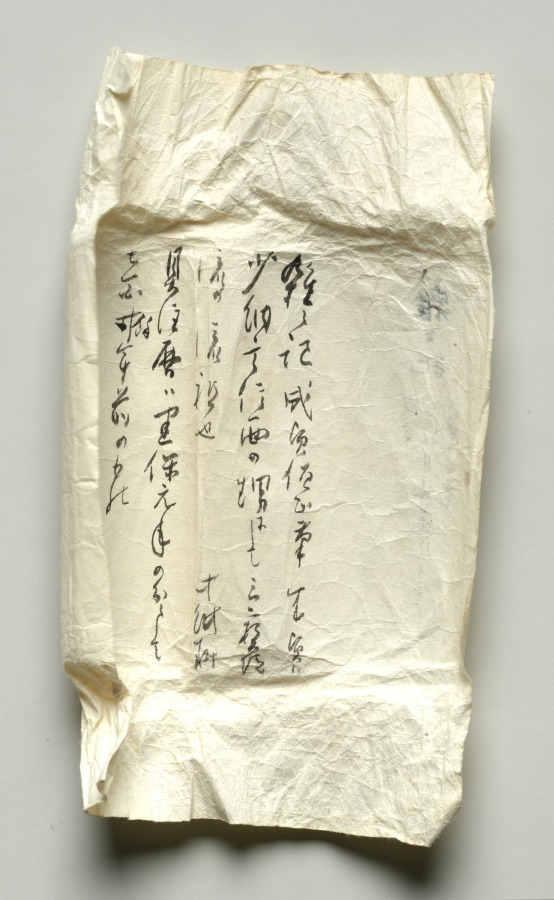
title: Scroll of Miscellaneous Notes written on a Calendar by Priest Seigen (verso)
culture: Japan, Kamakura period (1185–1333)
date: c. 1200–1231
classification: Manuscript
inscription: bears miscellaneous notes written by Priest Seigen.